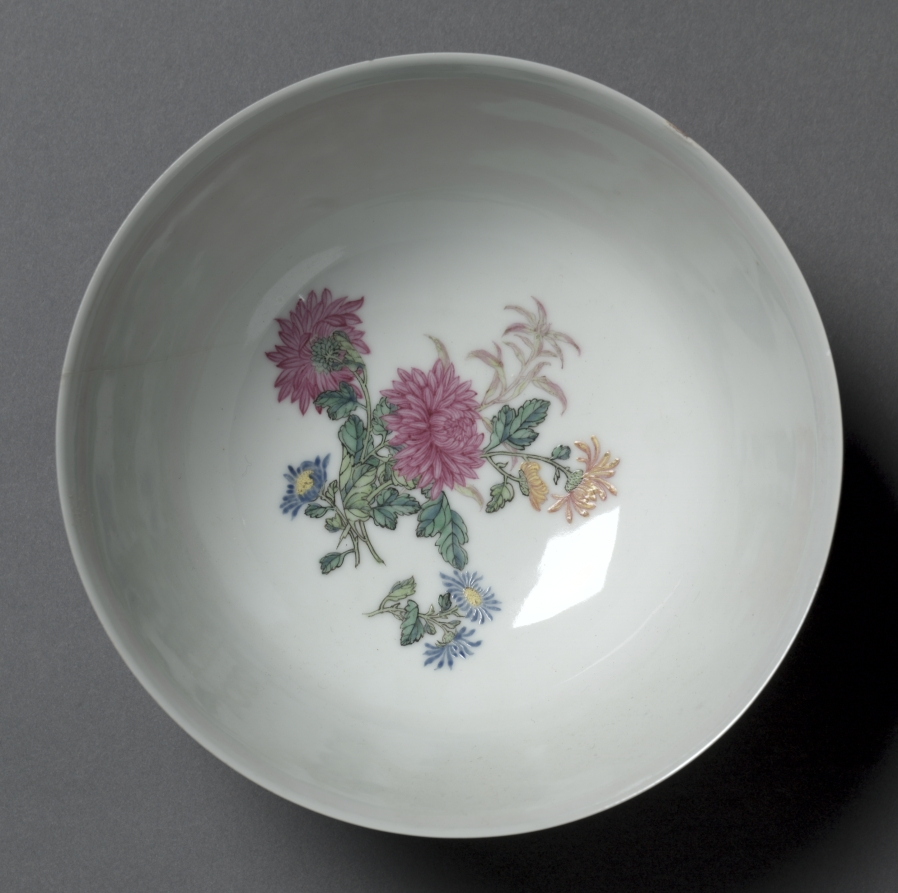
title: Bowl with Peony Sprays on Diaper Ground (exterior); Chrysanthemum Sprays (interior)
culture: China, Jiangxi Province, Jingdezhen, Qing dynasty (1644–1911), Qianlong mark and reign (1736–95)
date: 1736–95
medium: porcelain with famille rose overglaze enamel decoration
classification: Ceramic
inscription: 乾隆年製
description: The production of extraordinarily refined Qing imperial wares such as these could have involved the transportation of undecorated, plain porcelains from the imperial kilns in Jingdezhen, Jiangxi province, to the palace workshops in Beijing, where court painters applied the polychrome enamel decoration. The Qianlong reign mark on the base of the bowl is written with blue enamel over the transparent glaze.